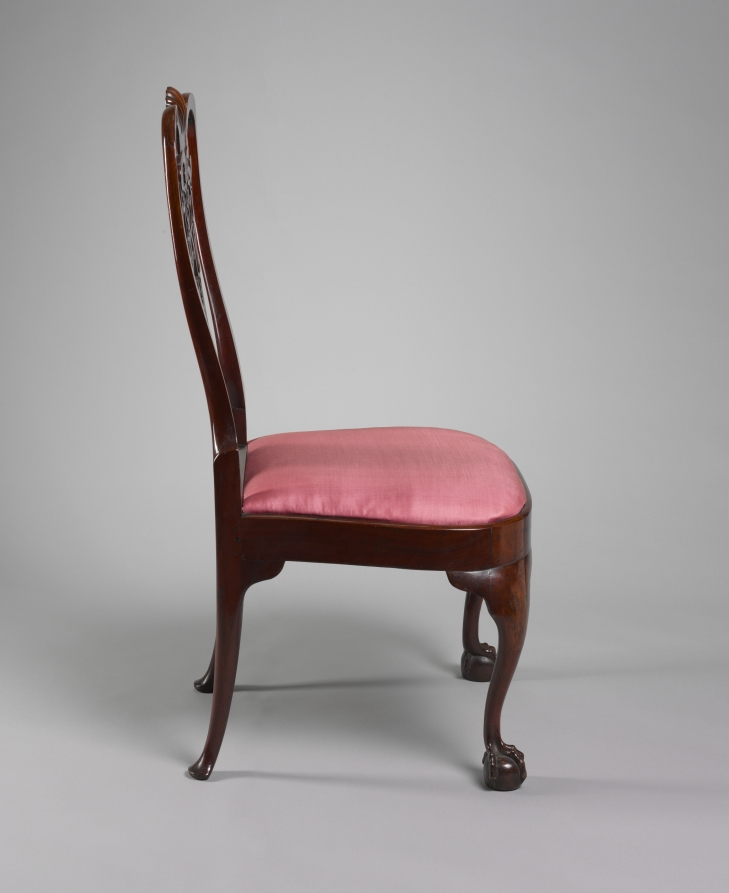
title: Side Chair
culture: America, New York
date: c. 1760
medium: mahogany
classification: Furniture and woodwork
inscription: pieced splat with initials of first owners: R M & L; seat cover with initials of second owner: C L G; Roman numeral VI incised on inner surface of rear seat rail.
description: Chairs with their splats pierced with a decorative monogram are rare in eighteenth-century English furniture, and this chair is part of a unique American set. The initials "R.M.L." are those of Robert (1718–1775) and Margaret Beekman (1724–1800) Livingston of Clemont, a house on the Hudson River north of New York City.